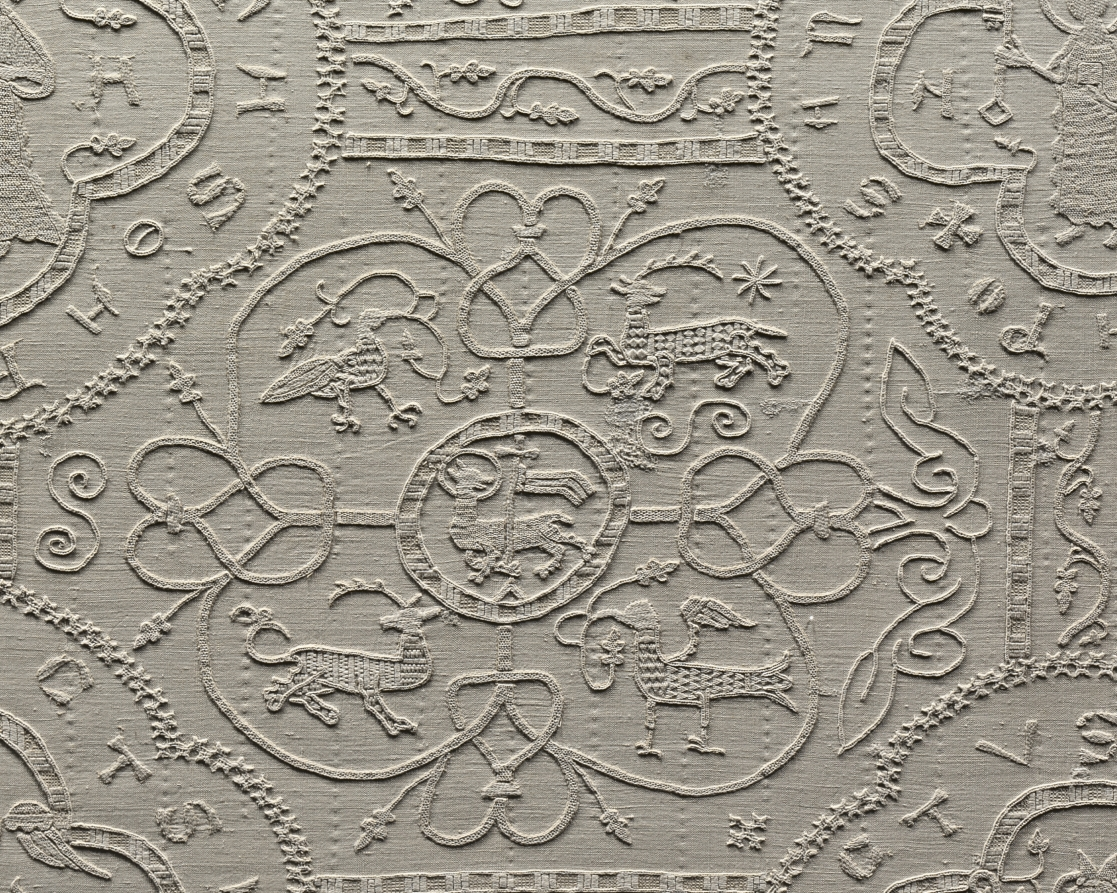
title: Altar Cloth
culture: Germany, Altenberg on the Lahn, Premonstratensian Convent, 14th century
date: c. 1350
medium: embroidery: linen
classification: Embroidery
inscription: various motifs enclosed in quatrefoils with identifying inscriptions in Gothic letters.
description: This large, embroidered altar cloth is one of the rarest, most important medieval church furnishings in existence. It was stitched by nuns in the Premonstratensian Convent in Altenberg on the Lahn River, north of Frankfurt, Germany, and was used to cover the church’s high altar in the weeks leading up to Easter. The cloth is an example of linen embroidery, a specialty of German nuns in the later Middle Ages. The Altenberg monastery church once had valuable furnishings; the high altar retable (a decorated frame with sculptures and paintings on the top of an altar) has survived, the main parts of which are now in the Städel Museum in Frankfurt, Germany.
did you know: When lit from behind, the previously hidden details emerge and the complex design becomes evident.